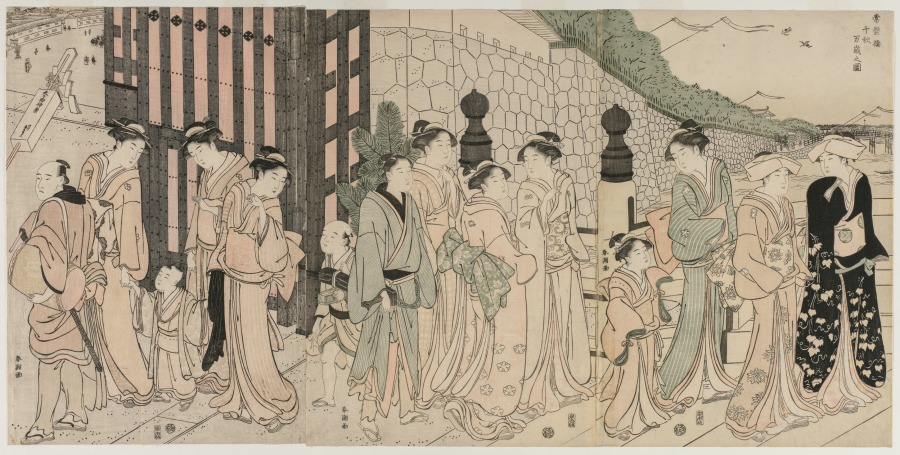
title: A Thousand Autumns, Ten Thousand Years on Tokiwa Bridge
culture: Japan, Edo period (1615–1868)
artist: Katsukawa Shunchō (Japanese)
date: early 1790s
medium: color woodblock print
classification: Print